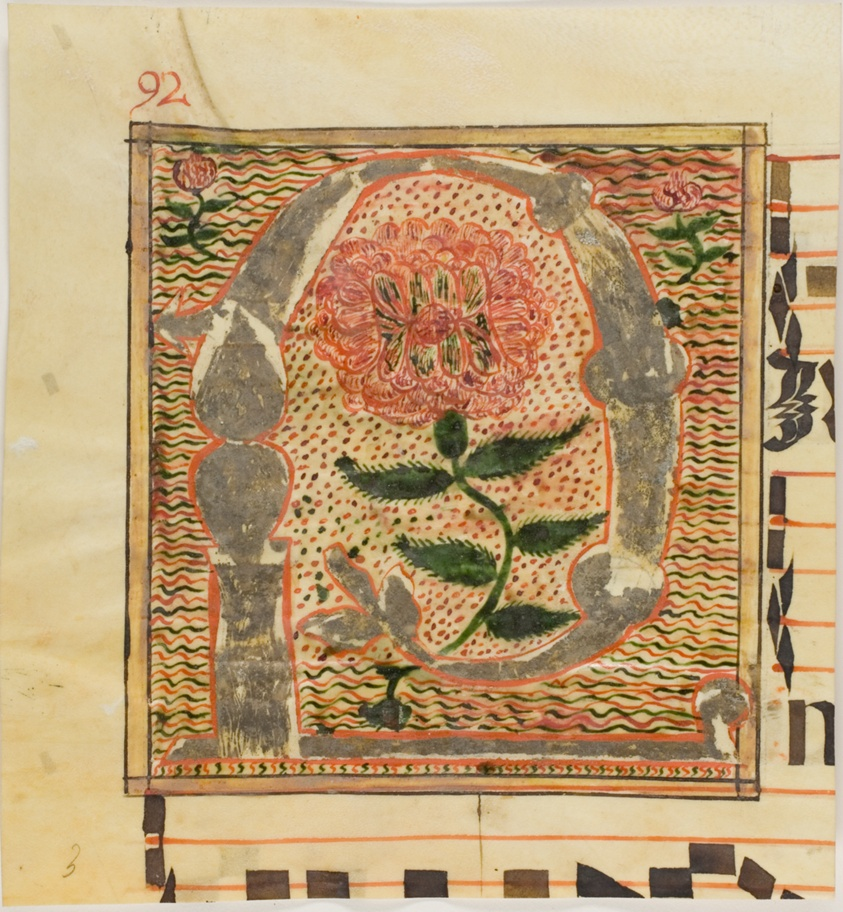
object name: Drawing and Watercolor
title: Decorated Initial "P" with Roses from a Manuscript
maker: European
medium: Manuscript cutting in tempera, colored inks, and silver leaf, with incising, and with Latin inscriptions in brownish black and red inks, ruled in red, on vellum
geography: Europe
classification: tempera; drawings (visual works); prints and drawing